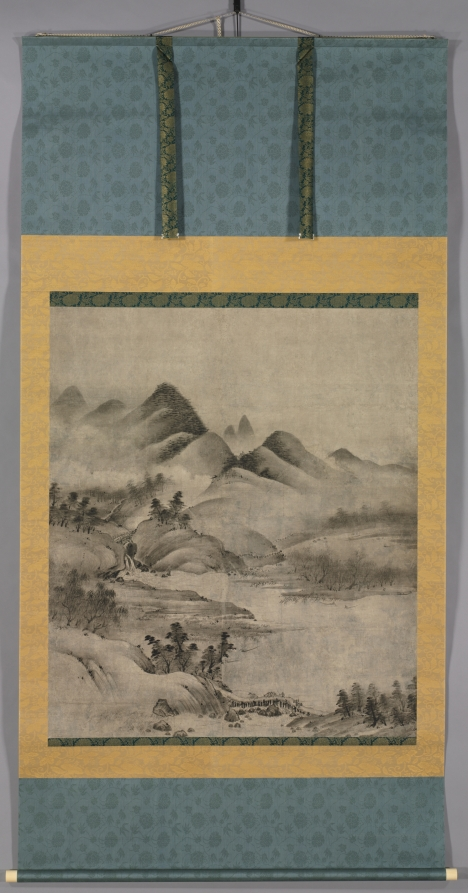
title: Landscape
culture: Japan, Muromachi period (1392–1573)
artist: Sōami (Japanese, d. 1525)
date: early 1500s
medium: hanging scroll; ink on paper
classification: Painting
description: Kyoto-based painter Sōami adapted the small-format Chinese album leaf and handscroll painting compositions belonging to the Ashikaga shogunate to the large-scale paintings he created for residences and Buddhist temples. As curator of the shogunal collection, Sōami would have carefully examined its Southern Song and Yuan dynasty Chinese paintings, gaining specialized knowledge of a variety of brush modes, including the soft style used for this painting. The scene is part of a continuous landscape once mounted in the folding screen format. Removed from the screen, this section of the painting was cut down, given new backing papers and a textile mounting with a hanging cord at the top and a roller with knobs at the bottom so that it could continue to be appreciated.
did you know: Another part of this composition survives in Kyushu, Japan.